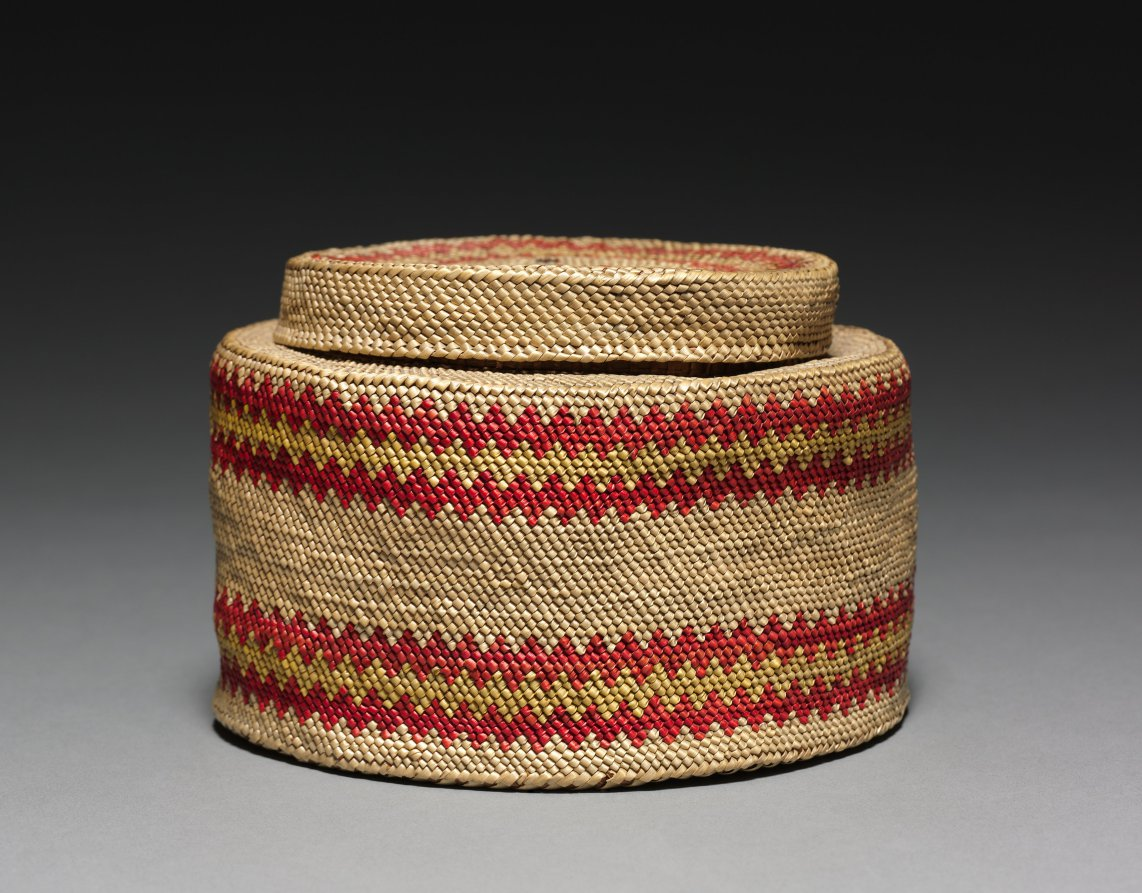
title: Ginger Jar- Shaped Basket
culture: Northwest Coast, Cape Flattery, Washington, Makah, late 19th-early 20th century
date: c 1900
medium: pear grass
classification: Basketry